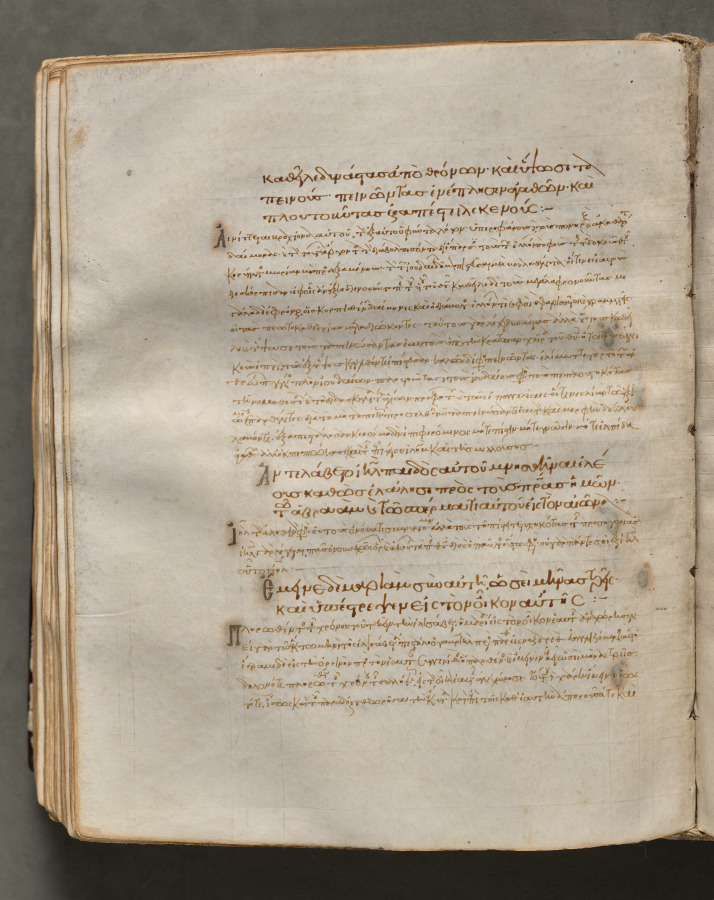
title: Text, folio 205 (verso), from a Gospel Book with Commentaries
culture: Byzantium, Constantinople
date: c. 1000–1100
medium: ink, tempera, and gold on vellum; leather binding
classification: Bound Volume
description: Each of the four gospels in this book opens on a page with brilliantly illuminated borders depicting the author of the text as well as birds-principally peacocks, symbols of the immortality of the soul-and fountains, representing the fountain of life and the salvation of the soul. This volume consists of 428 leaves with texts in Greek. Its level of sophistication suggests that it was probably written and decorated in a monastery in Constantinople.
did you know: Gospel Books were carried in procession through Byzantine churches.